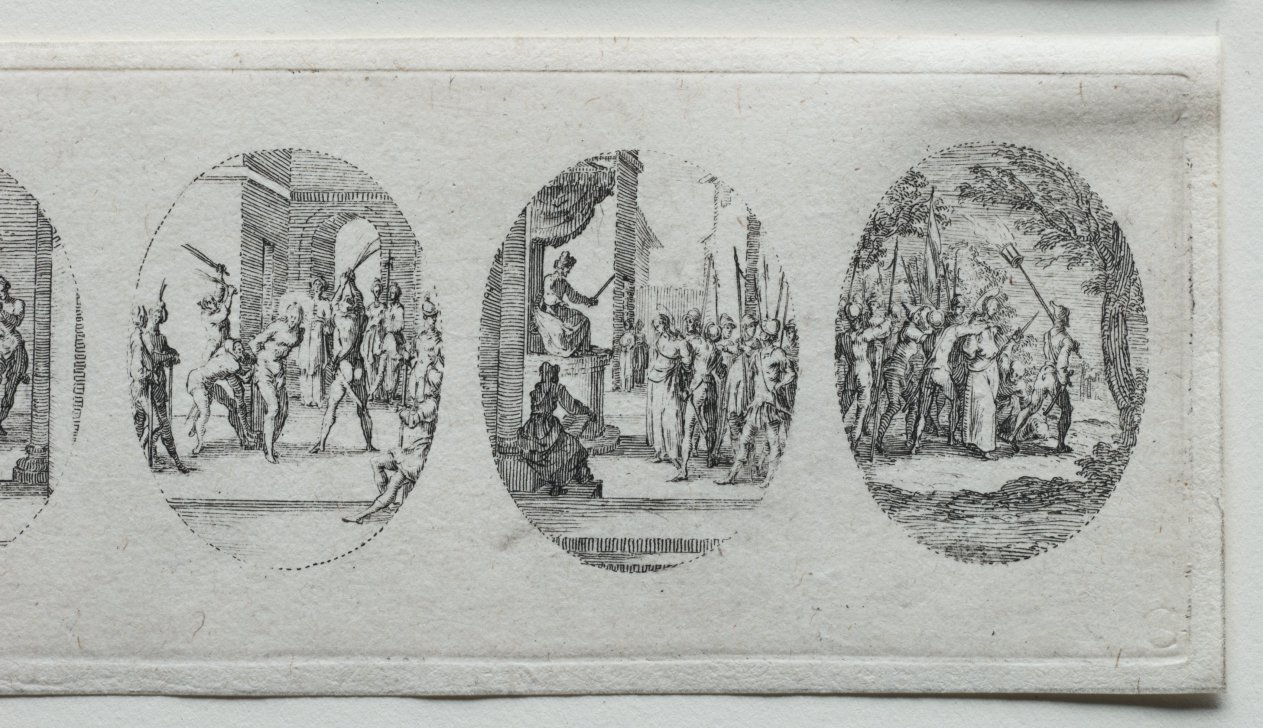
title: The Mysteries of the Passion: Christ before Pilate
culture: France, 17th century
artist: Jacques Callot (French, 1592–1635)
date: 1631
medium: etching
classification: Print